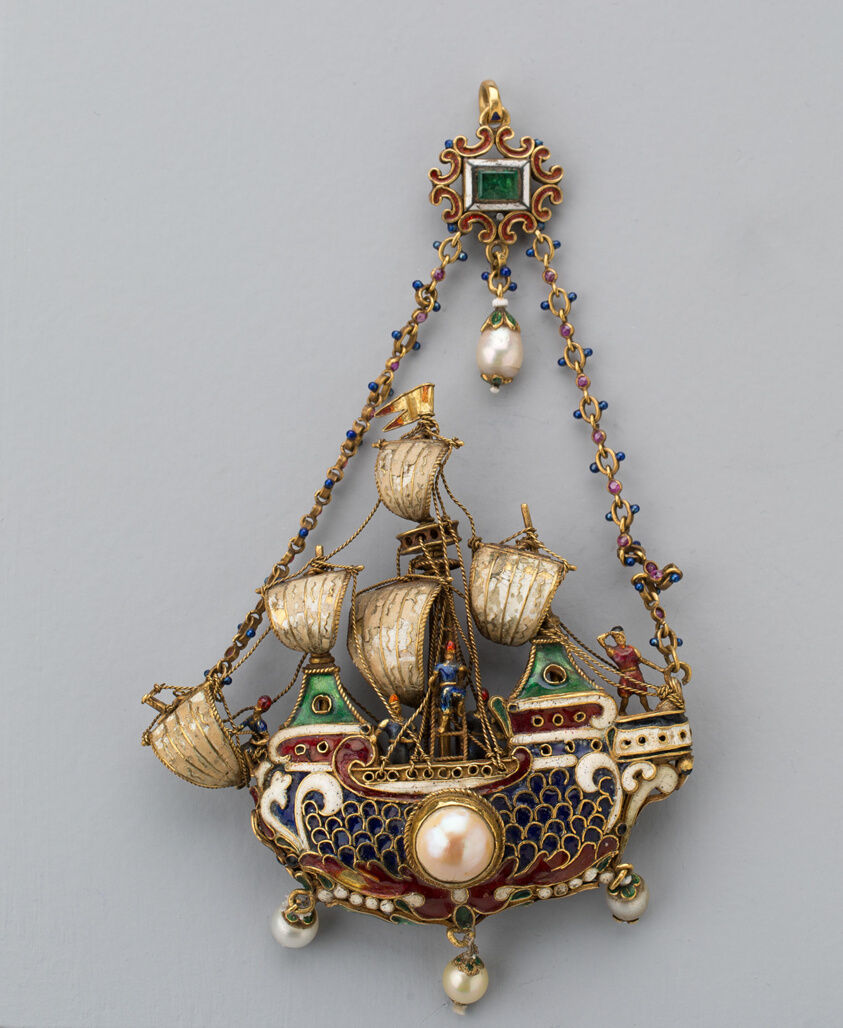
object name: Decorative Arts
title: Pendant Shaped as a Ship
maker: Probably eastern Mediterranean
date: 17th/18th century (with later additions)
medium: Gold, enamels, pearls, and emerald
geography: Eastern Mediterranean Region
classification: pendant (jewelry); jewelry; european decorative arts; decorative arts